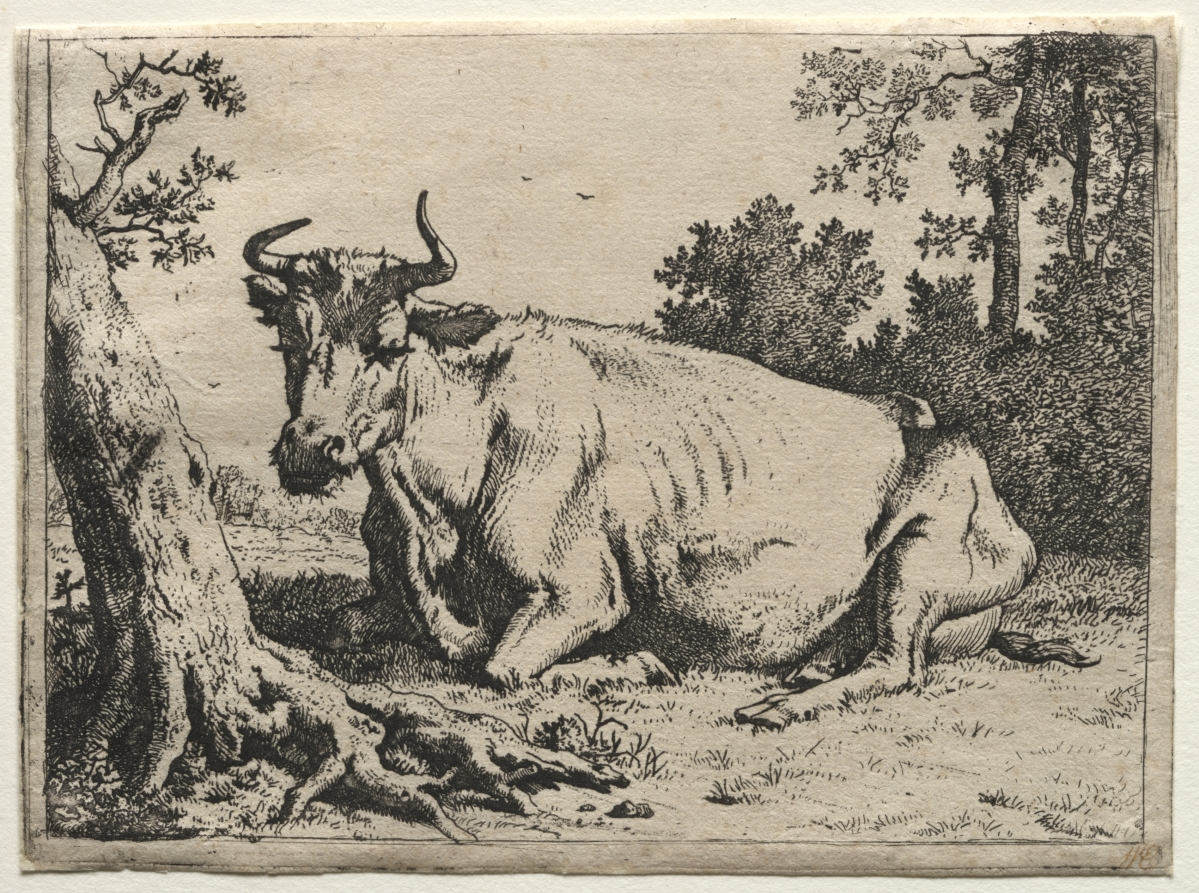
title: The cow lying down near a tree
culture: Netherlands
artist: Paulus Potter (Dutch, 1625–1654)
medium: etching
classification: Print